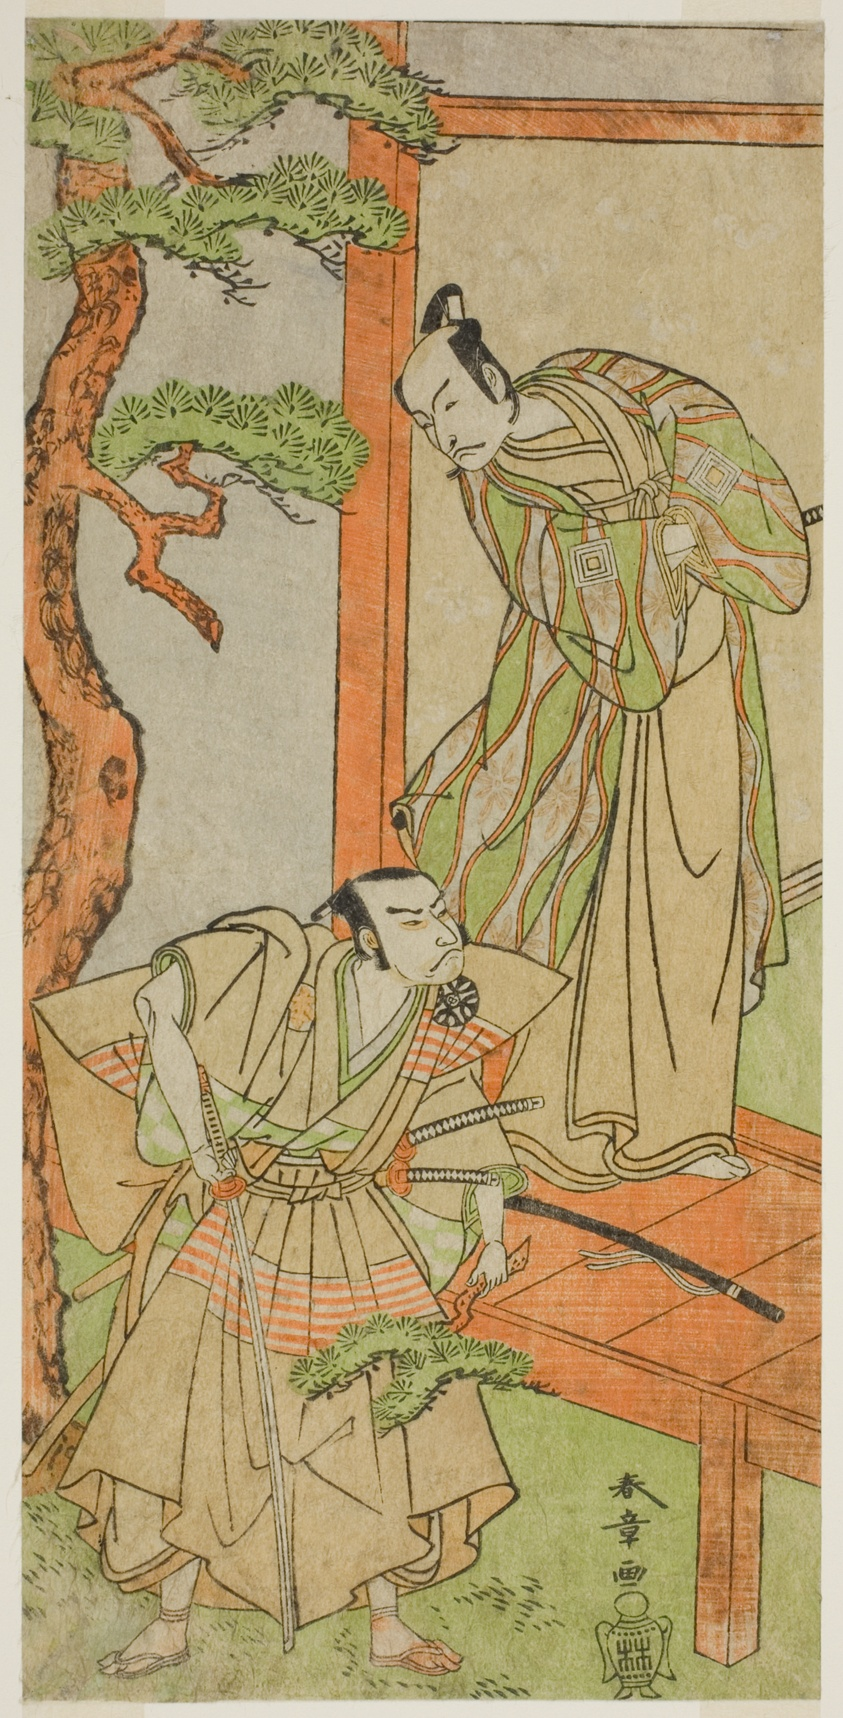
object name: Print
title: The Actors Ichikawa Danjuro V as Momonoi Wakasanosuke (right), and Nakamura Nakazo I as Kakogawa Honzo (left), in the Play Kanadehon Chushingura, Performed at the Nakamura Theater in the Fifth Month, 1771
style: Japanese (culture or style)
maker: Katsukawa Shunsho 勝川 春章; Japanese, 1726-1792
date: c. 1771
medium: Color woodblock print; hosoban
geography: Japan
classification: woodblock print; print; asian art